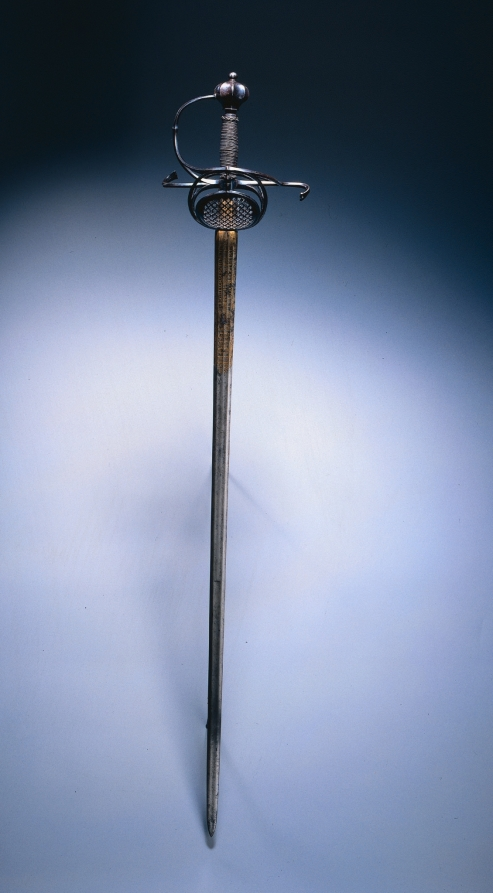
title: Rapier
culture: Germany, Solingen, 17th century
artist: Clemens Horn (German, 1586–1617)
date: c. 1620–30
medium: steel, blued and gilded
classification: Arms and Armor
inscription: NEC TEMPARE NEC TIMIDE / INTER ARMA SILENT LEGE / VERITATEM DILIGE ET PUGNA PRO PATRIA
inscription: Unicorn Head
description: This weapon has an especially handsome configuration of hilt, pommel, quillons, and guard. The blade is also very finely wrought and bears the mark (a unicorn head) of the German swordsmith, Clemens Horn, of Solingen, a town near Düsseldorf. The Latin inscription on the blade reads in translation: "Neither without cause, nor fearfully/Between arms and silent law/ Prize truth and the fight for one's country."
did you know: The "Pappenheimer" hilt seen here is named after Count Pappenheimer (1594-1632) who popularized the style which offered more protection to the hand with its large pierced plates.